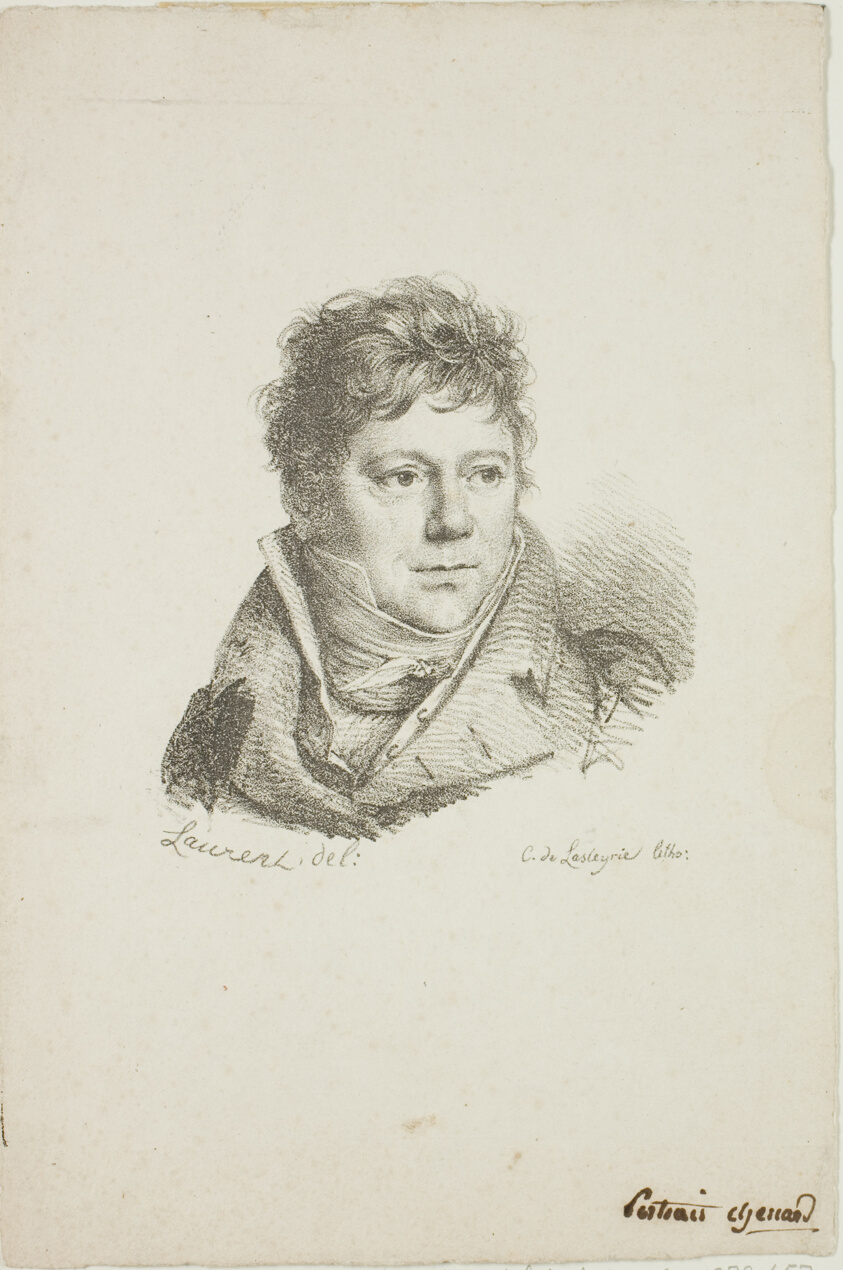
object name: Print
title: Portrait of M. Chenard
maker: Jean Antoine Laurent (French, 1763-1832); printed by Comte de Charles Philibert Lasteyrie du Saillant (French, 1759-1849)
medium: Lithograph in black on ivory wove paper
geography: France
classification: lithograph; print; prints and drawing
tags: portraits